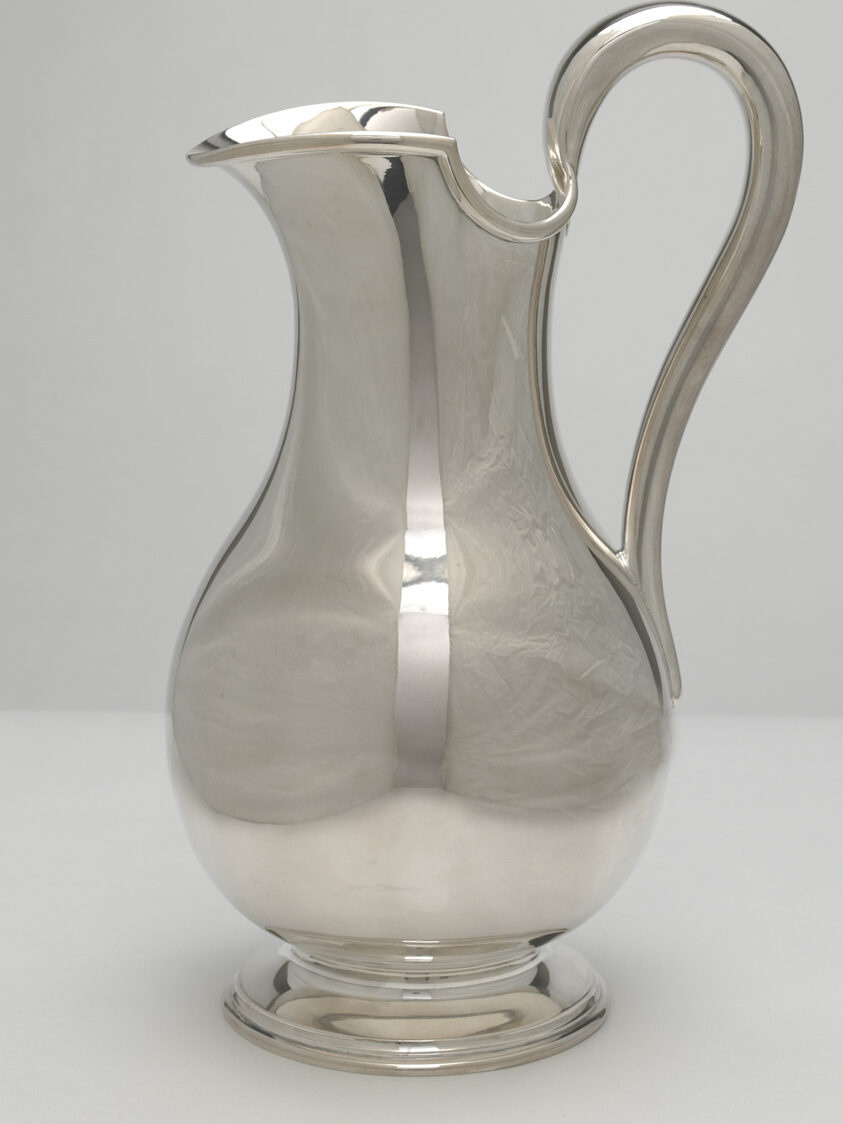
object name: Metalwork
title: Pitcher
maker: R. & W. Wilson; American, 1825–1883; Philadelphia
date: 1825–46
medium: Silver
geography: Philadelphia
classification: pitcher (vessel); vessel; silver; american decorative arts; american arts; decorative arts